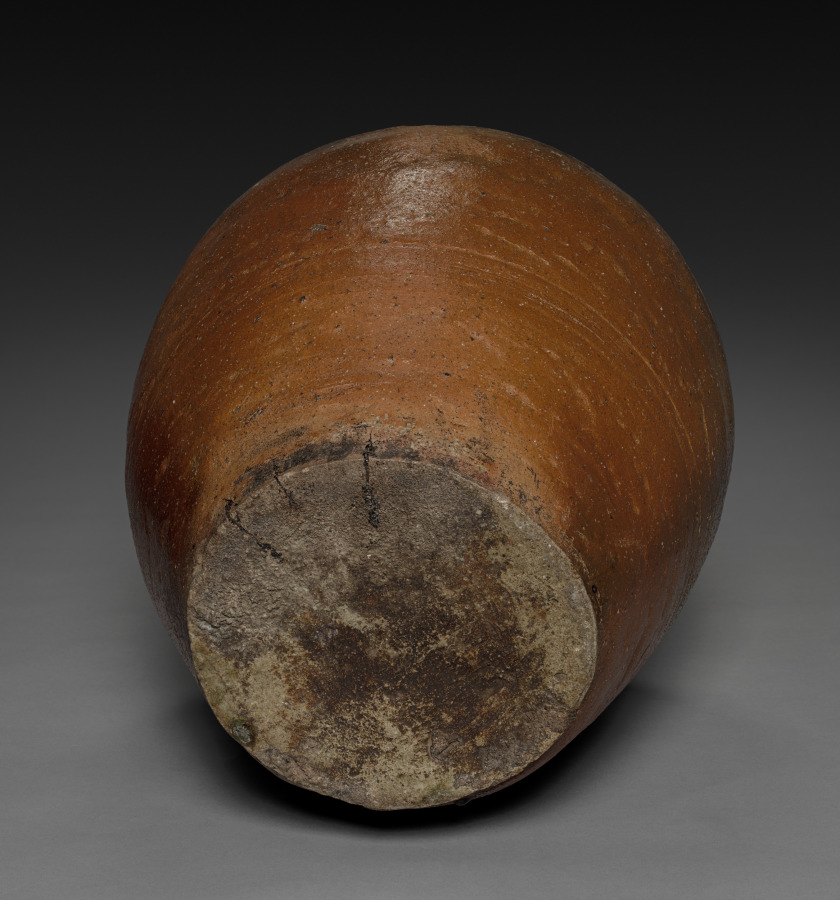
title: Storage Jar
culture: Japan, Muromachi period (1392–1573)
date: 1400s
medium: Stoneware with natural ash glaze (Tamba ware)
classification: Ceramic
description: For centuries the Tokai region surrounding present-day Nagoya has been an especially fertile ceramic production center. One site was a group of kilns located west of Kyoto, in Tamba province. Nestled in a farming valley in the mountains behind the modern port of Kobe, Tamba required a regular supply of storage vessels and sturdy containers for distributing grain. This jar was formed in three sections, each fluted to the next and turned on a potter's wheel to scrape off excess material. Both interior and exterior walls were smoothed with a wooden or bamboo tool, leaving markings on the lower body and shoulder. The neck opening is small and wheel-turned, as is the neck, which bears fine lines and a matte-glazed surface. The lustrous green glaze that highlights the jar once trailed from the vessel's lip and clung to the entire shoulder wall, mingling with the warm, orange-brown tone of the clay body underneath. The surface is crackled with craters where stone material within the clay migrated up to the surface during firing and then fell away. The result is a particularly rich and varied "landscape," typical of Tamba ware's subdued, earthy vitality.